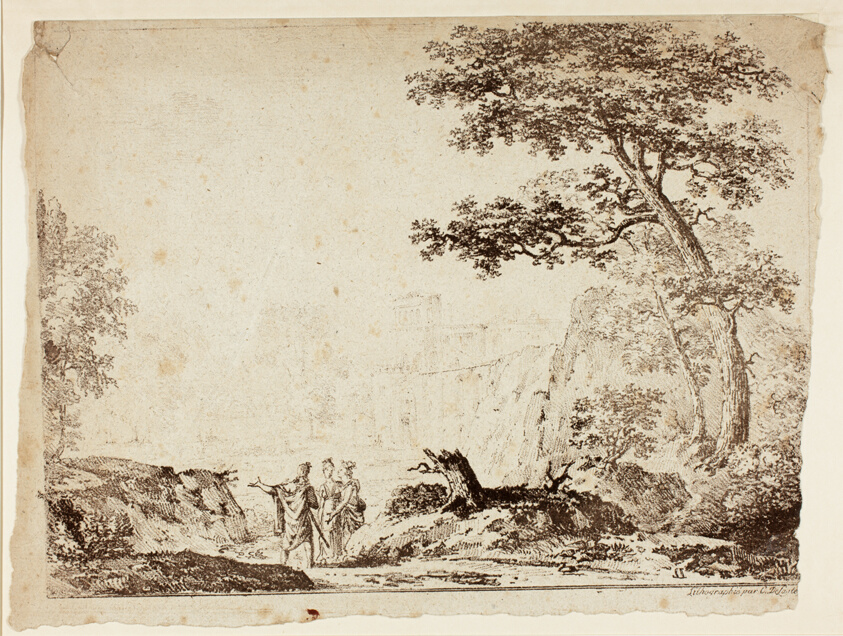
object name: Print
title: Roman Landscape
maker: Ferdinand (French, 19th century); printed by Comte de Charles Philibert Lasteyrie du Saillant (French, 1759-1849)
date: 1800/49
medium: Lithograph in dark brown on ivory laid paper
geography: France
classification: lithograph; print; prints and drawing